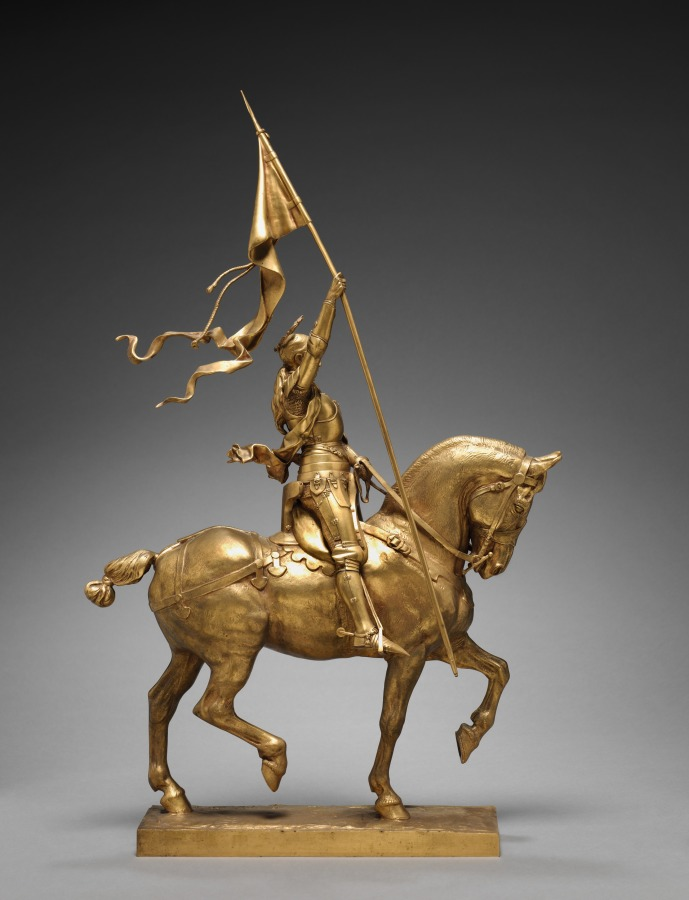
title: St. Joan of Arc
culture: France, 19th century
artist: Emmanuel Fremiet (French, 1824–1910)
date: 1874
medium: gilt bronze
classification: Sculpture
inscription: signed: "FREMIET"; inscription on flag: "IHS, MARIA."